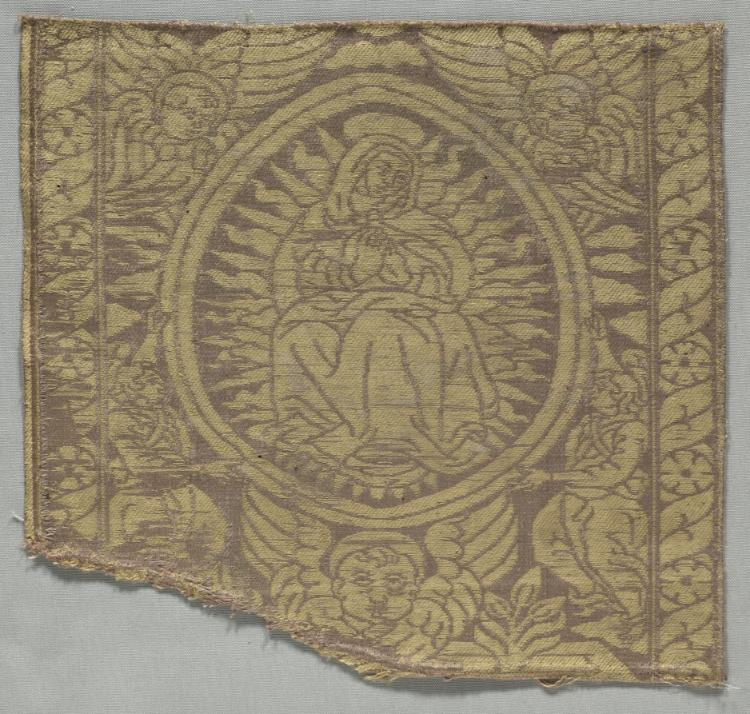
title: Fragment of Orphrey Band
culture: Italy, 16th century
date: 1500s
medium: silk lampas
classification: Textile